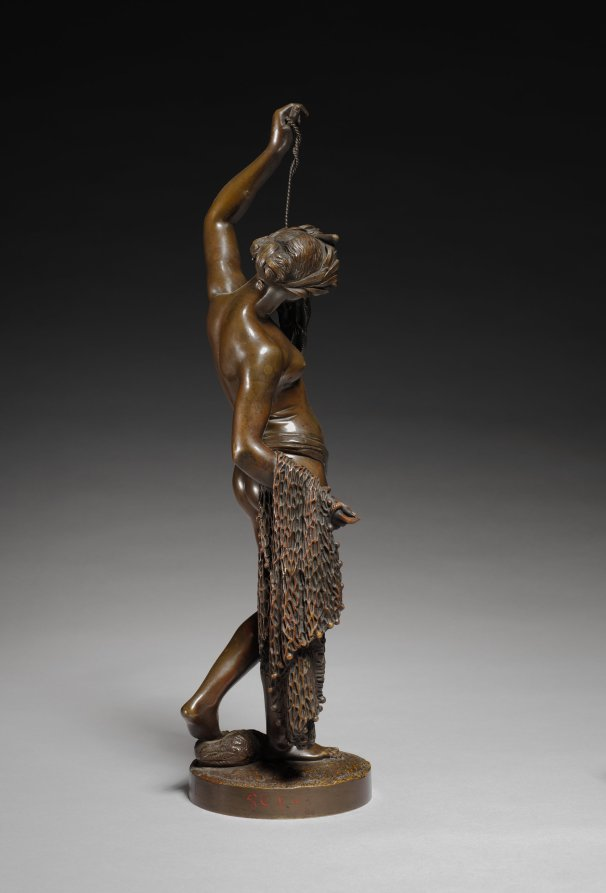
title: Allegory of Fishing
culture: France, 19th century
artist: James Pradier (Swiss, 1790–1852)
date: c. 1840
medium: bronze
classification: Sculpture